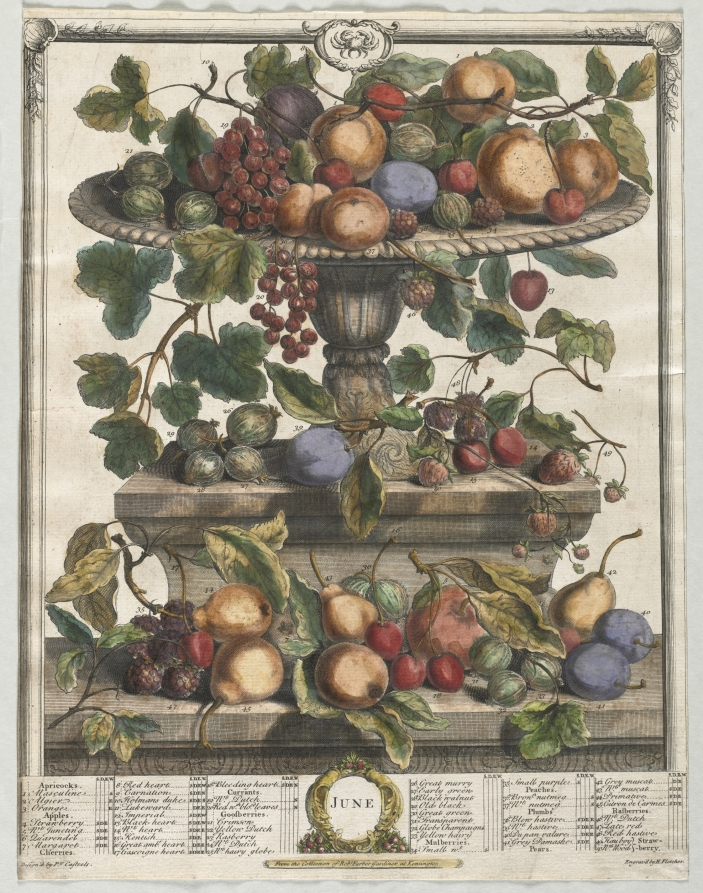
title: Twelve Months of Fruit: June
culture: England, 18th century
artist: Henry Fletcher (British, active 1715–38)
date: 1732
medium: engraving, hand-colored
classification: Print